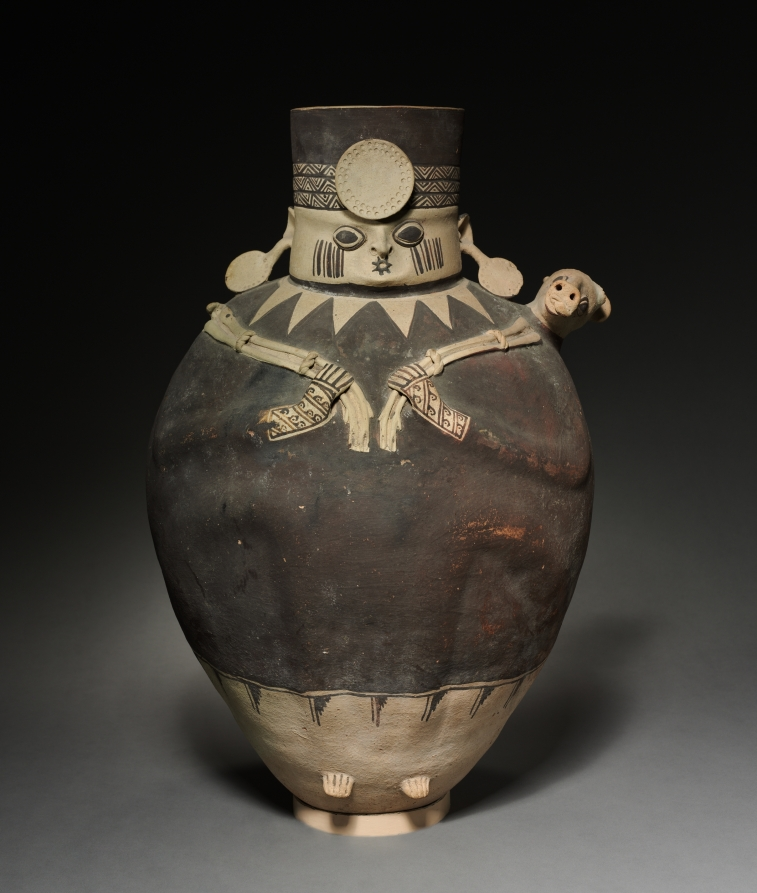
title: Vessel in the Shape of a Figure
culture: Peru, Central Coast, Chancay sytle, 12th-15th century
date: 1000–1460s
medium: earthenware with painted slip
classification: Ceramic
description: This seated figure carries a stag over his shoulders, its antlers now missing and its tongue lolling out in death. That the stag is destined for more than dinner is suggested by the human's pursed lips--perhaps the kiss-like expression of reverence that the later Inka made when approaching a sacred shrine. The animal, then, may be an offering. The two bags painted on the figure's back may be for coca leaves, also very important for rituals. In comparison to earlier ceramics, the Chancay style seems less fine both artistically and technically. yet as this vessel proves, the best Chancay ceramics have appealing charm, in part because of their bold brown-on-white color scheme.